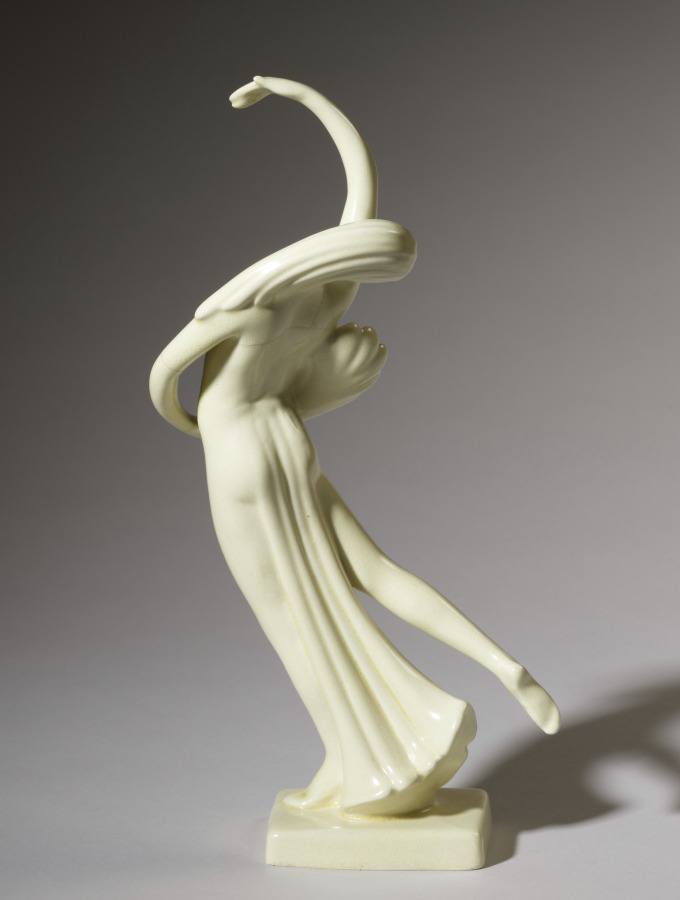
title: Fan Dancer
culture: America, Ohio, Cleveland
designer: Waylande Gregory (American, 1905–1971)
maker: Cowan Pottery Studio (America, Rocky River, Ohio, 1920–1931)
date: 1928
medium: glazed ceramic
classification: Ceramic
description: A stamp on the bottom of this ceramic sculpture indicates that it was produced at the Cowan Pottery studios. Although unsigned, it was most likely designed by Waylande Gregory, one of the studio’s premiere artists. In 1928 the studio’s founder, R. Guy Cowan, brought Gregory to Cleveland from Chicago, where he was developing a reputation as a talented young sculptor. Cowan Pottery, located in Lakewood (1912–17) and later Rocky River (1919–32), Ohio, began producing ceramic sculpture in the mid-1920s, launching its most fertile creative period. Cowan employed a large team of talented artists at the studio, including Walter Sinz, Thelma Frazier Winter, and Viktor Schreckengost. The studio brought national fame to Cleveland ceramists, but was forced to close due to economic circumstances in 1932.